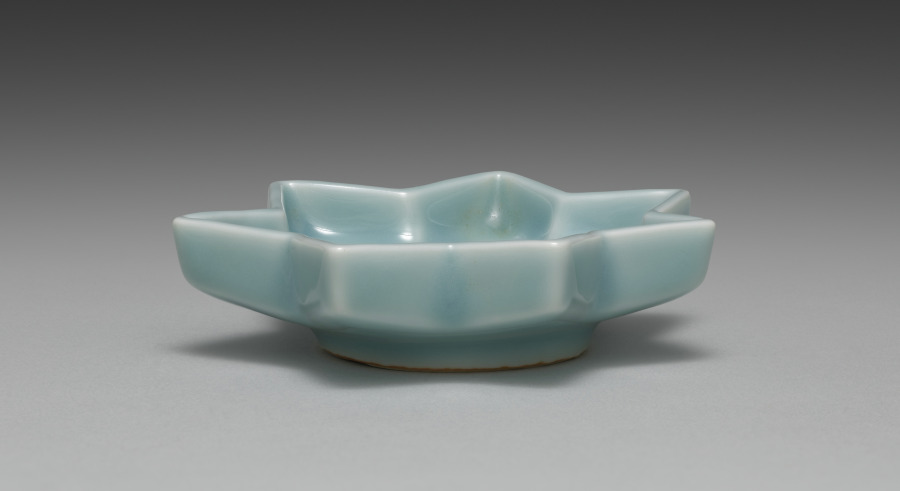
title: Saucer from Maple Leaf-Shaped Saucers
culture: Japan, Meiji period (1868–1912)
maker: Seifū Yohei III (Japanese, 1851–1914)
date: 1893–1914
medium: One of five dishes from a set of ten; porcelain with blue glaze and molded design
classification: Ceramic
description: These maple leaf–shaped saucers, like Yohei III's five shell saucers CMA 2022.188, have a long, horizontal box with a separate compartment for each piece. Now a set of five, these dishes were originally a set of ten, stored in two boxes of five each. From their housings, which accommodate differing numbers of objects, one can hypothesize that while some items created by the Seifu studio were intended to be acquired in larger sets, and thus were perhaps made to order, others, like these, may have been items to be purchased of the shelf in set quantities that allowed clients flexibility in scale. The box for these five saucers describes them as “heavenly blue[–glazed] porcelain” (tenseiji). The veins of the leaves are slightly raised in the clay so that the glaze pools around them and they stand out as white where the glaze thins. There are longer lines at the points of the leaves and shorter ones following the wall of each indentation so that the design has both a horizontal and a subtle vertical dimension.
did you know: These saucers shaped like maple leaves show Seifū Yohei III’s “heavenly blue glaze.”